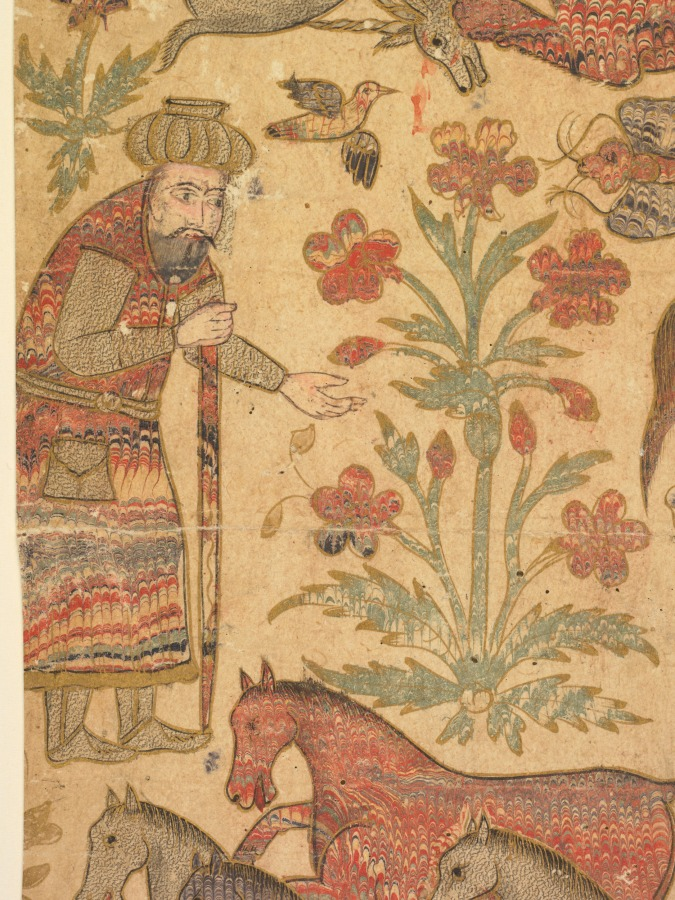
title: A marbled picture of Rustam catching Rakhsh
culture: India, Bijapur, Deccan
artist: attributed to Shafi (Indian, active about 1650)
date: c. 1650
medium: Gum tempera and gold on paper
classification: Painting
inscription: apocryphal inscription lower left: 'amal-i mir Kalan 904 verso: inscription identifying the scene of Rustam capturing Rakhsh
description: This scene depicts the young hero Rustam catching a foal, Rakhsh (meaning “light”), who will be his faithful companion through many adventures. A prophet-like shepherd figure with a staff at the upper left predicts that Rustam will be the savior of Iran. At the top of the page a feline has caught its prey, while a hunter steps on its tail. This extraordinary painting has more applications of marbled colorant than any other known example. Even all the flowers and birds have been articulated through marbling in a feat of registration and control by a master of the technique.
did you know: Even the flowers and insects used as filler in this composition were marbled.